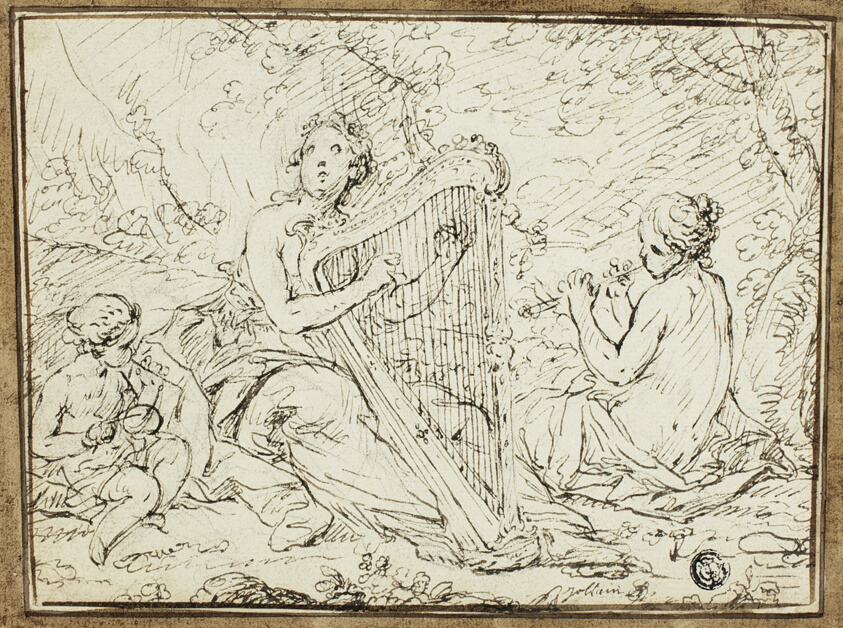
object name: Drawing and Watercolor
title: Nymphs Playing Musical Instruments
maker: Attributed to Nicolas René Jollain; French, 1732-1804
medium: Pen and brown ink, over black chalk, on ivory laid paper, laid down on cream laid paper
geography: France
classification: pen and ink drawings; drawings (visual works); prints and drawing